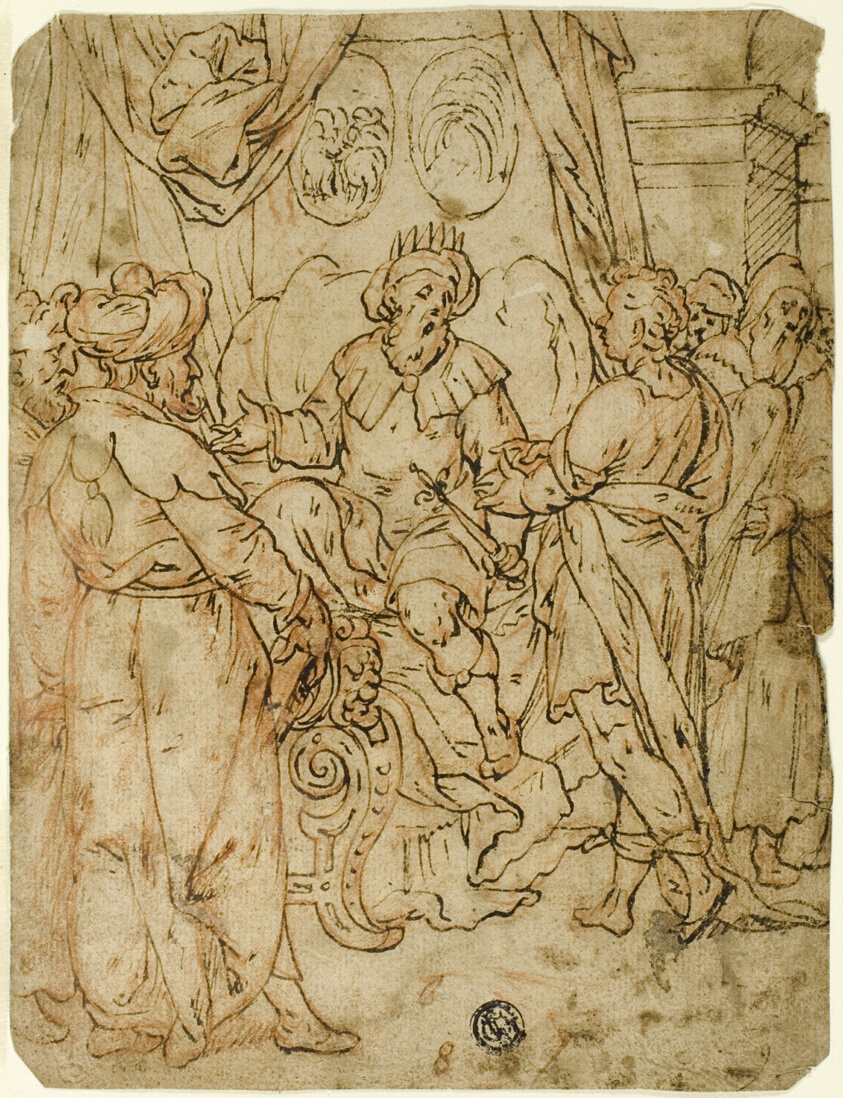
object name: Drawing and Watercolor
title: Joseph Interpreting the Pharoah's Dream (recto) Joseph before His Brothers (verso)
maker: Circle of Aurelio Lomi (Italian, 1556-1622)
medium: Pen and brown ink over red chalk, on tan laid paper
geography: Italy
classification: pen and ink drawings; drawings (visual works); prints and drawing